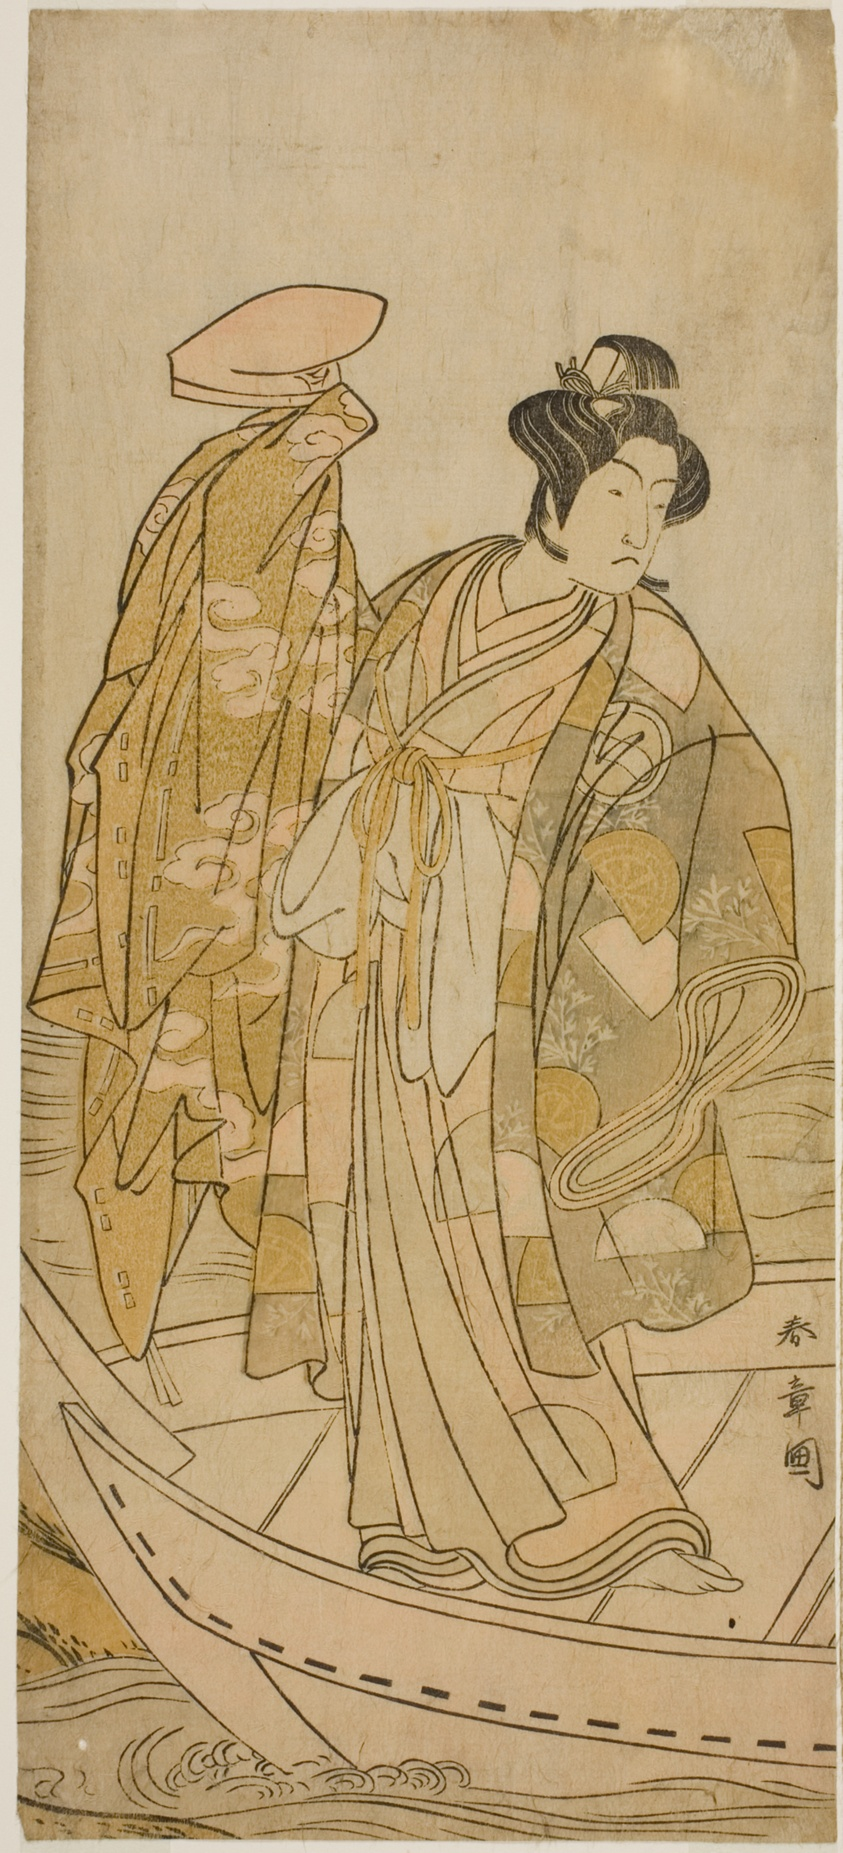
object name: Print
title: The Actor Ichikawa Monnosuke II as Minamoto no Yorinobu in the Play Kikujido Shuen no Iwaya, Performed at the Morita Theater in the Eleventh Month, 1775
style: Japanese (culture or style)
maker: Katsukawa Shunsho 勝川 春章; Japanese, 1726-1792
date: c. 1775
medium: Color woodblock print; hosoban; center sheet of triptych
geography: Japan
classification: woodblock print; print; asian art